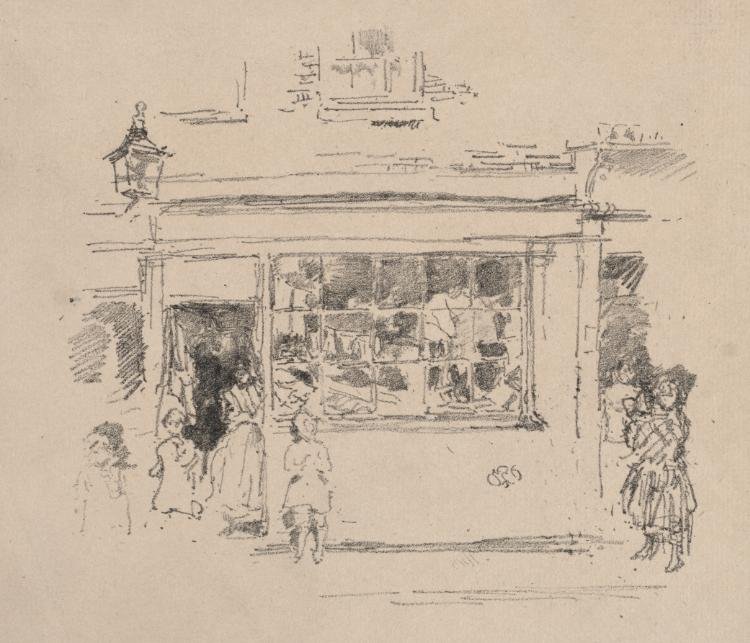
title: Drury Lane Rags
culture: America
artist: James McNeill Whistler (American, 1834–1903)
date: 1888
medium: lithograph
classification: Print